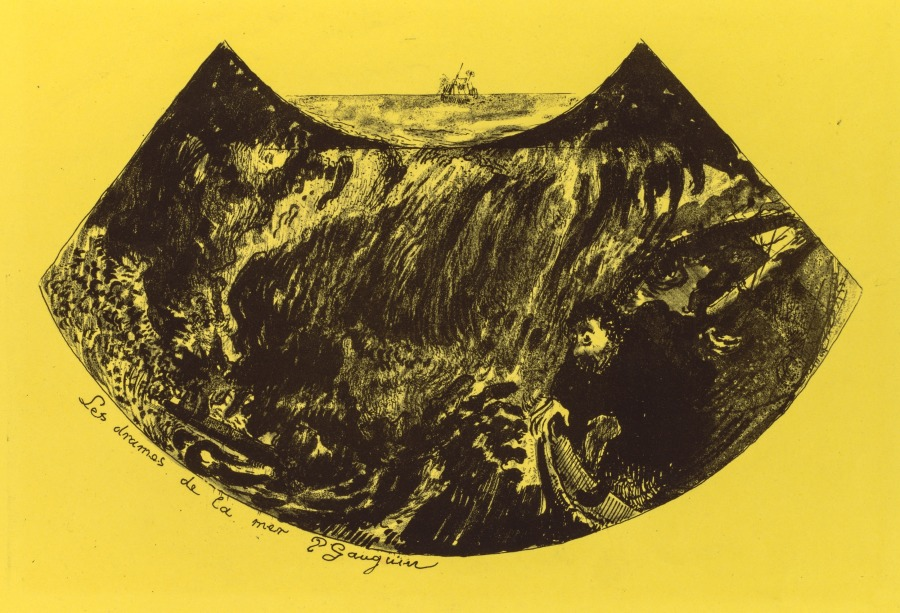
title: Volpini Suite: Dramas of the Sea (Les Drames de la Mer)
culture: France, 19th century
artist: Paul Gauguin (French, 1848–1903)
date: 1889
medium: zincograph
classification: Print